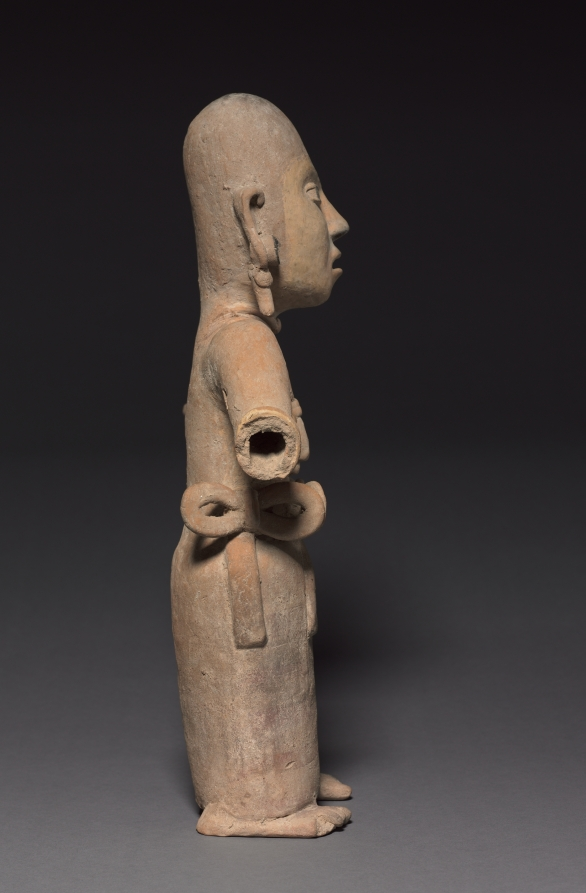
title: Female Figure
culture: Mexico, Southern Veracruz, Limon, Remojades Monumental Sculpture type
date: 200–500 CE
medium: pottery with burnished buff slip and asphalt paint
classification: Sculpture